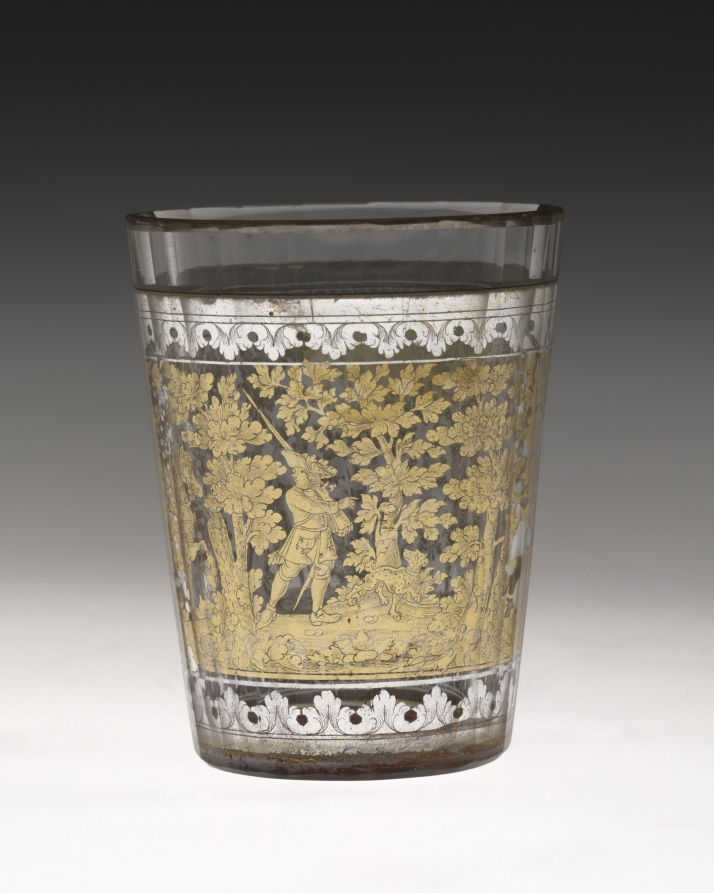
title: Tumbler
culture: Bohemia, 18th century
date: c. 1730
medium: zwischengoldglas (glass)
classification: Glass